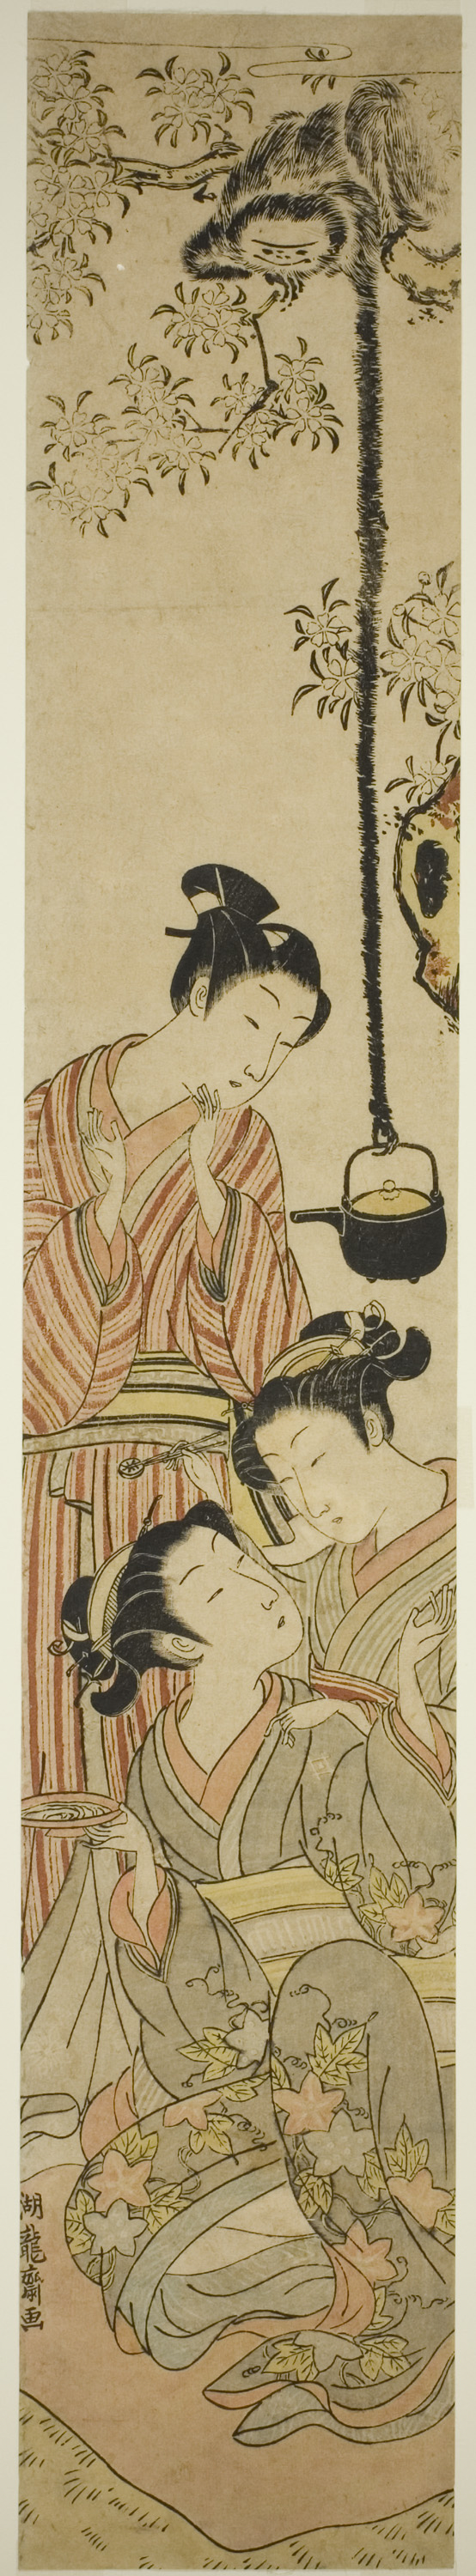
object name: Print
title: Gibbon snatching sake pot from flower-viewing party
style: Japanese (culture or style)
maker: Isoda Koryusai (Japanese, 1735-1790)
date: c. 1772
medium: Color woodblock print; hashira-e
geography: Japan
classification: woodblock print; print; asian art